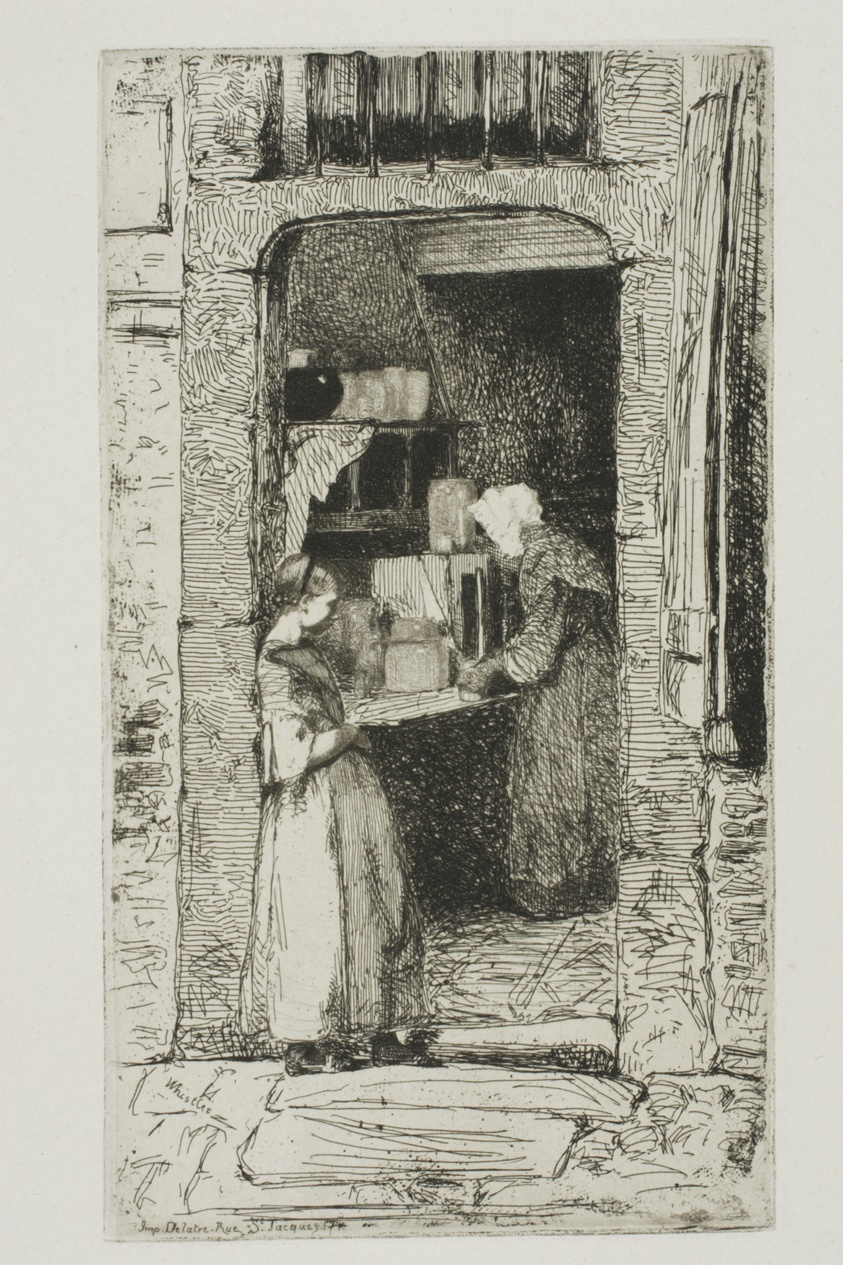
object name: Print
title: La Marchande de Moutarde (The Mustard Seller)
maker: James McNeill Whistler (American, 1834-1903)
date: 1858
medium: Etching with foul biting in black ink on off-white China paper laid down on off-white wove paper, chine collé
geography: United States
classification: etching; foul biting; print; prints and drawing; paper